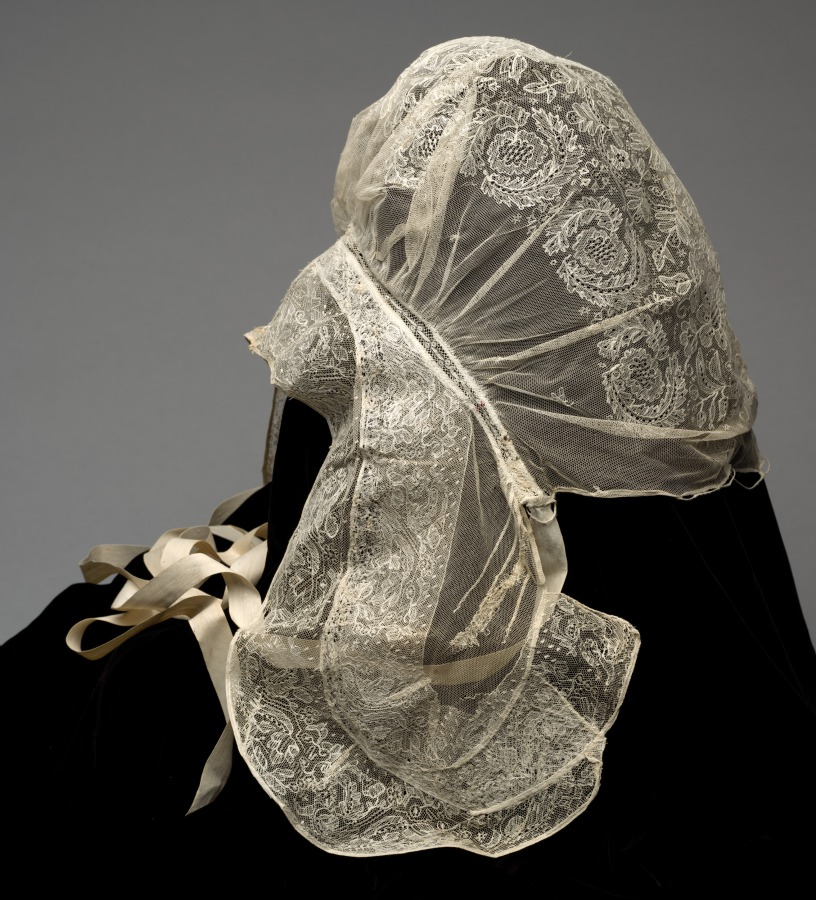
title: Lace Cap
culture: Netherlands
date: 1700s–early 1800s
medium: Lace net with embroidery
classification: Garment